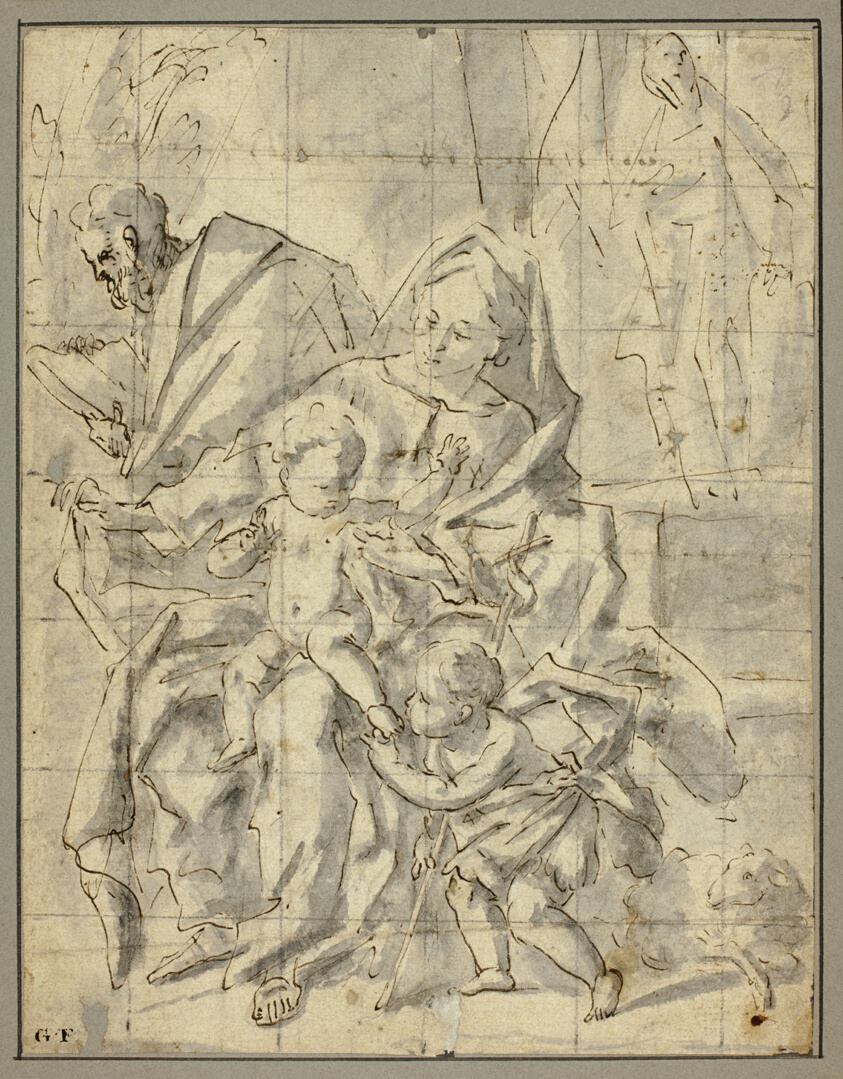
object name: Drawing and Watercolor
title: Holy Family with Infant Saint John the Baptist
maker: Atributed to Gaspare Diziani (Italian, 1689-1767); or follower of Giovanni Antonio Bilivert (Italian, 1576-1644); or unknown Neopolitan artist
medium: Pen and brown ink with brush and gray wash, squared in black chalk, on cream laid paper, laid down on card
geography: Italy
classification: drawings (visual works); prints and drawing